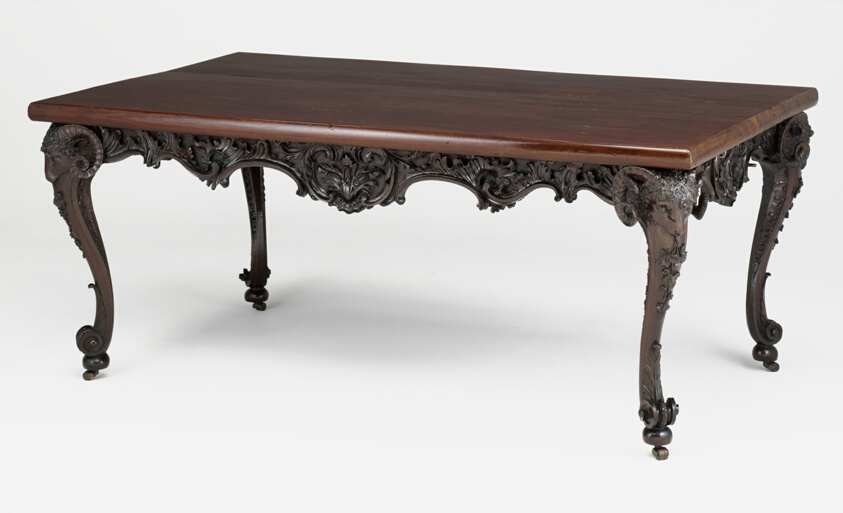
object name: Furniture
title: Center Table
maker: England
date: c. 1755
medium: Cuban mahogany and iron fittings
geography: England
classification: table; european decorative arts; furniture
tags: furniture